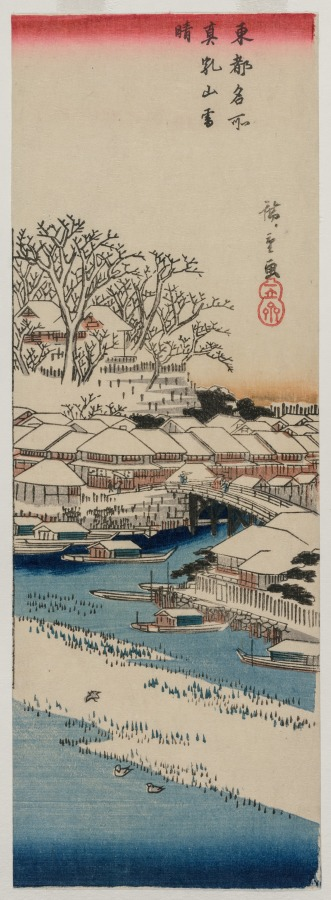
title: Clear Weather after Snow at Matsuchiyama, from the series Famous Places in the Eastern Capital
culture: Japan, Edo period (1615–1868)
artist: Utagawa Hiroshige (Japanese, 1797–1858)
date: late 1830s or early 1840s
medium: color woodblock print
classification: Print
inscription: Signature: Hiroshige ga